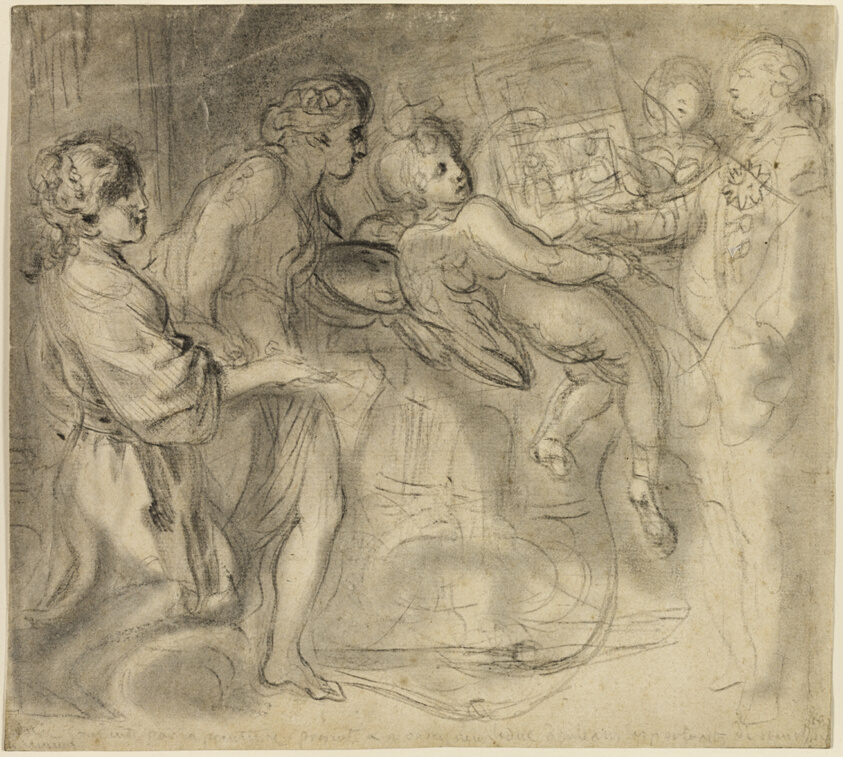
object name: Drawing and Watercolor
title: The Genius of Painting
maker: Gabriel Jacques de Saint-Aubin (French, 1724-1780)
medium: Charcoal with stumping, erasing, and incising on ivory laid paper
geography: France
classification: chalk; prints and drawing; drawings (visual works); wash